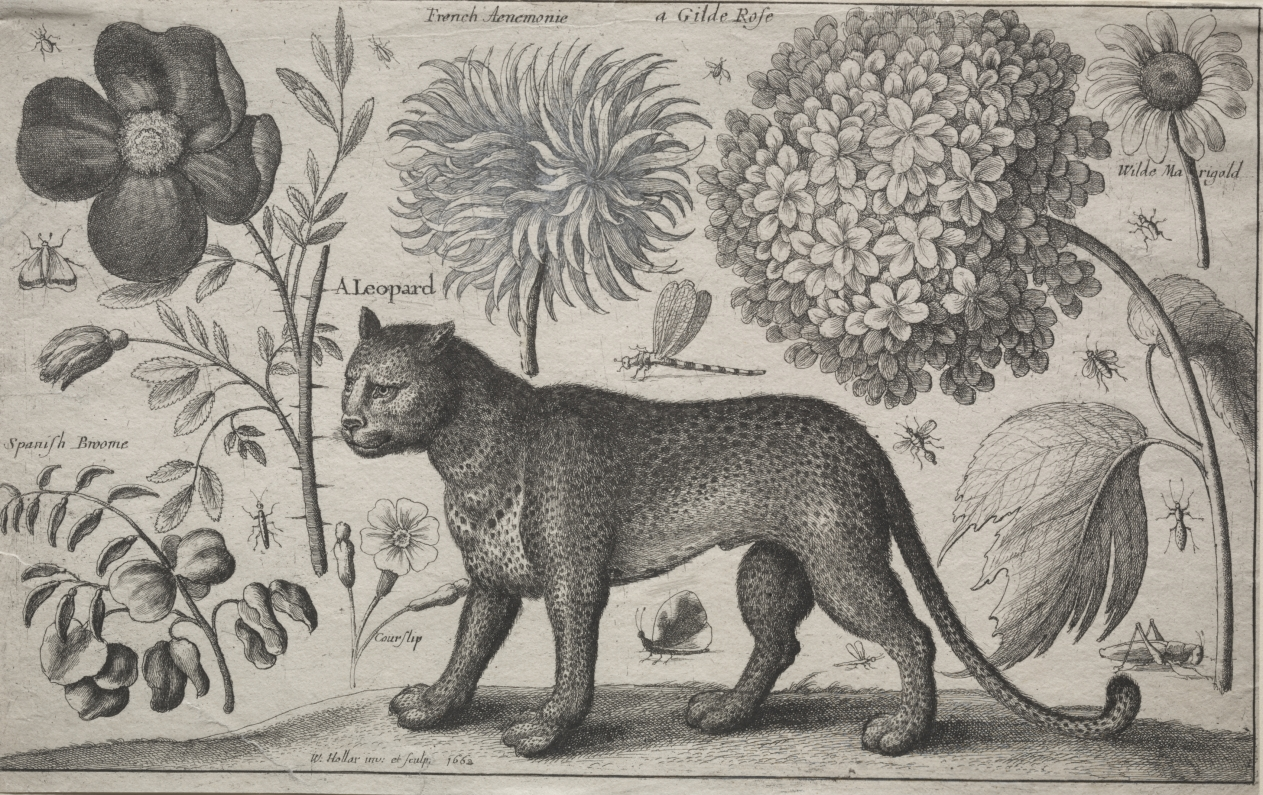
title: Animals and Plants: Leopard with Plants and Insects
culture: Bohemia, 17th century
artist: Wenceslaus Hollar (Bohemian, 1607–1677)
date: 1662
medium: etching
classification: Print